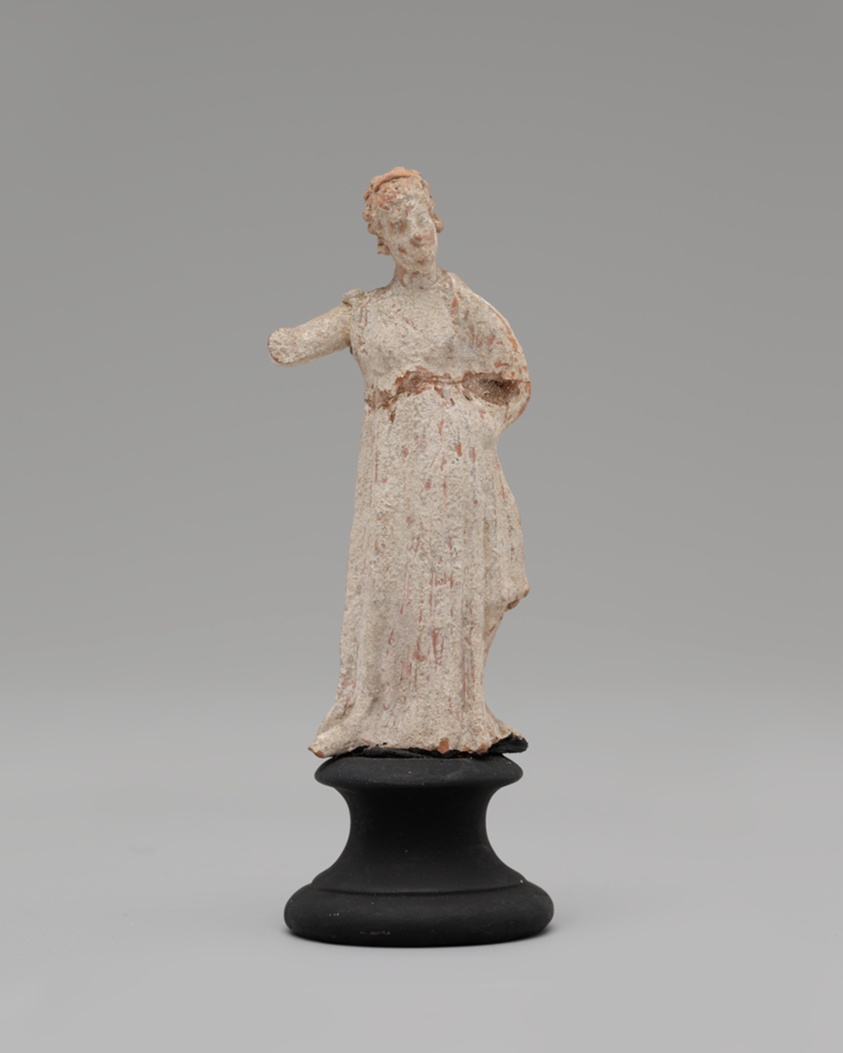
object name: Sculpture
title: Figurine of a Standing woman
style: greek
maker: Greek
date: 4th-3rd century BCE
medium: terracotta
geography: Greece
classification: earthenware; ceramics; sculpture; ancient art